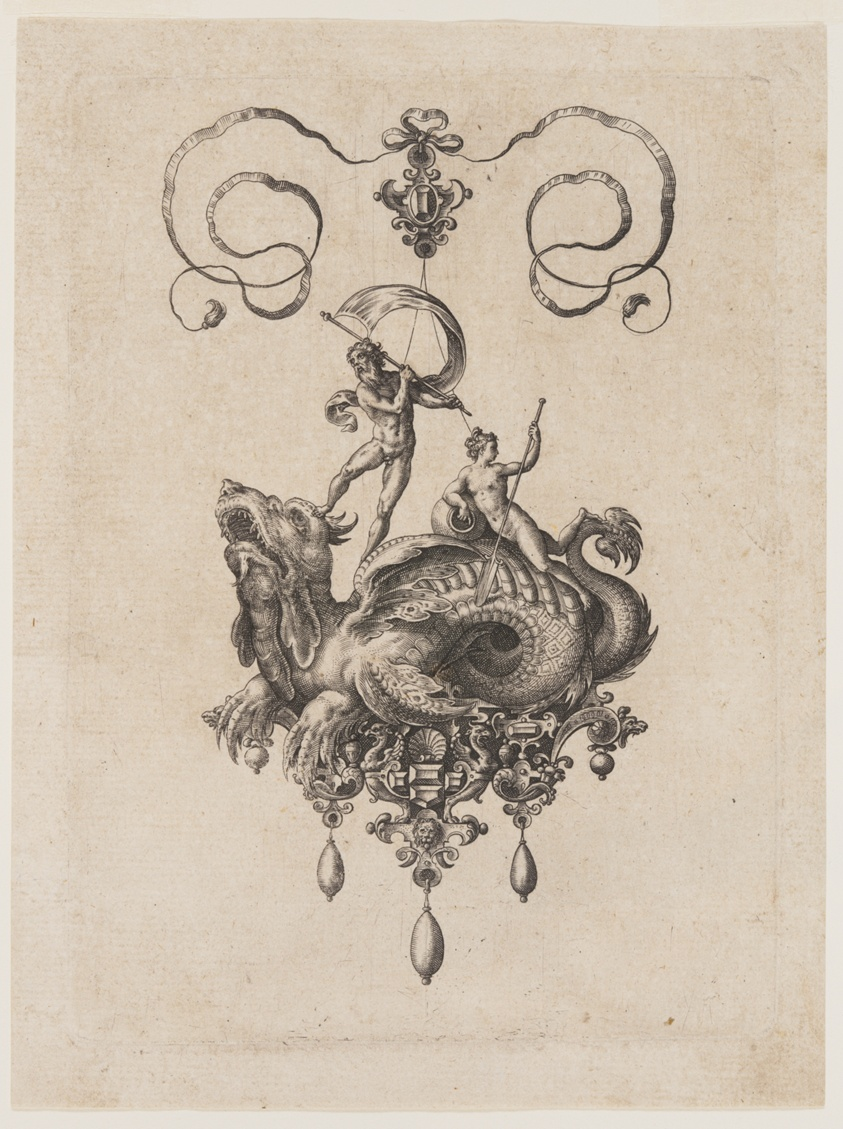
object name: Print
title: Designs for Pendants with Sea Monsters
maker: Adriaen Collaert (Flemish, c. 1560–1618); after Hans Collaert (Flemish, c. 1530–1581)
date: 1582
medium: Engraving on ivory laid paper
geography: Flanders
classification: engraving; paper; print; prints and drawing